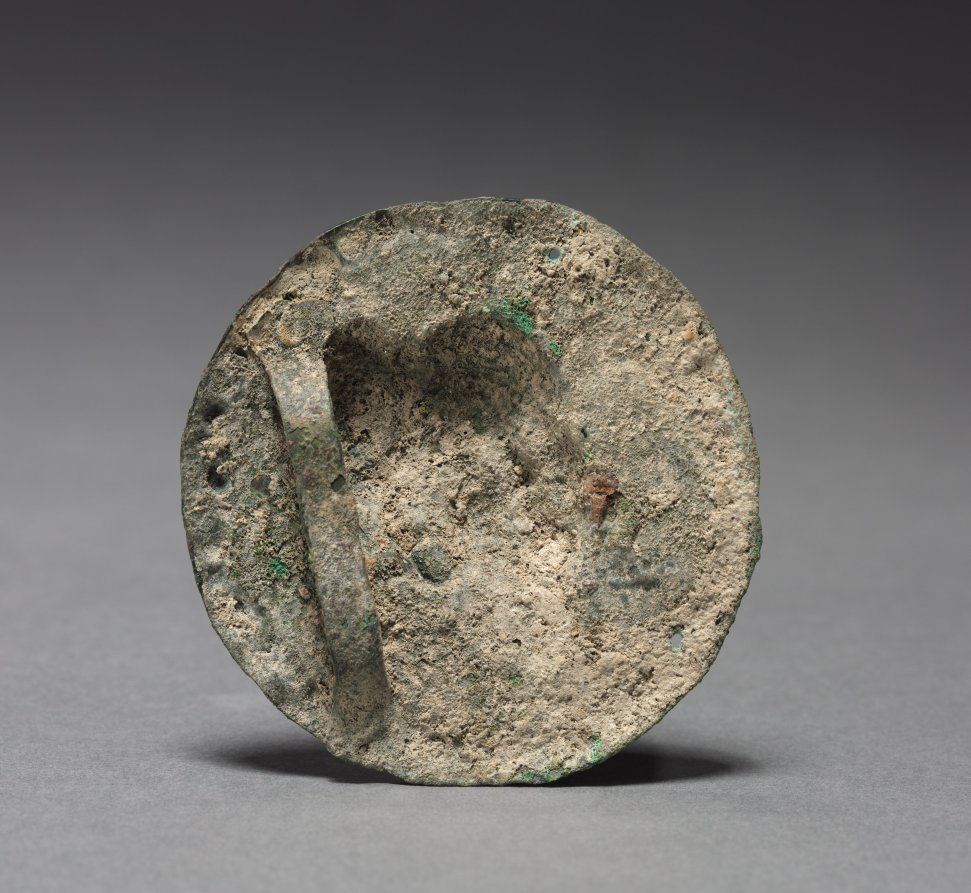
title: Roundel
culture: India, Satavahana period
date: c. 100–1 BCE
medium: bronze with repoussé and chased designs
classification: Sculpture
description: The form of a medallion with a figural bust and bead-and-reel border indicates the artist’s familiarity with Greco-Roman objects. The figure itself, however, is Indian, with voluminous, coiled coiffures and prominent jewelry. This object was probably worn as an ornament on a belt or girdle.